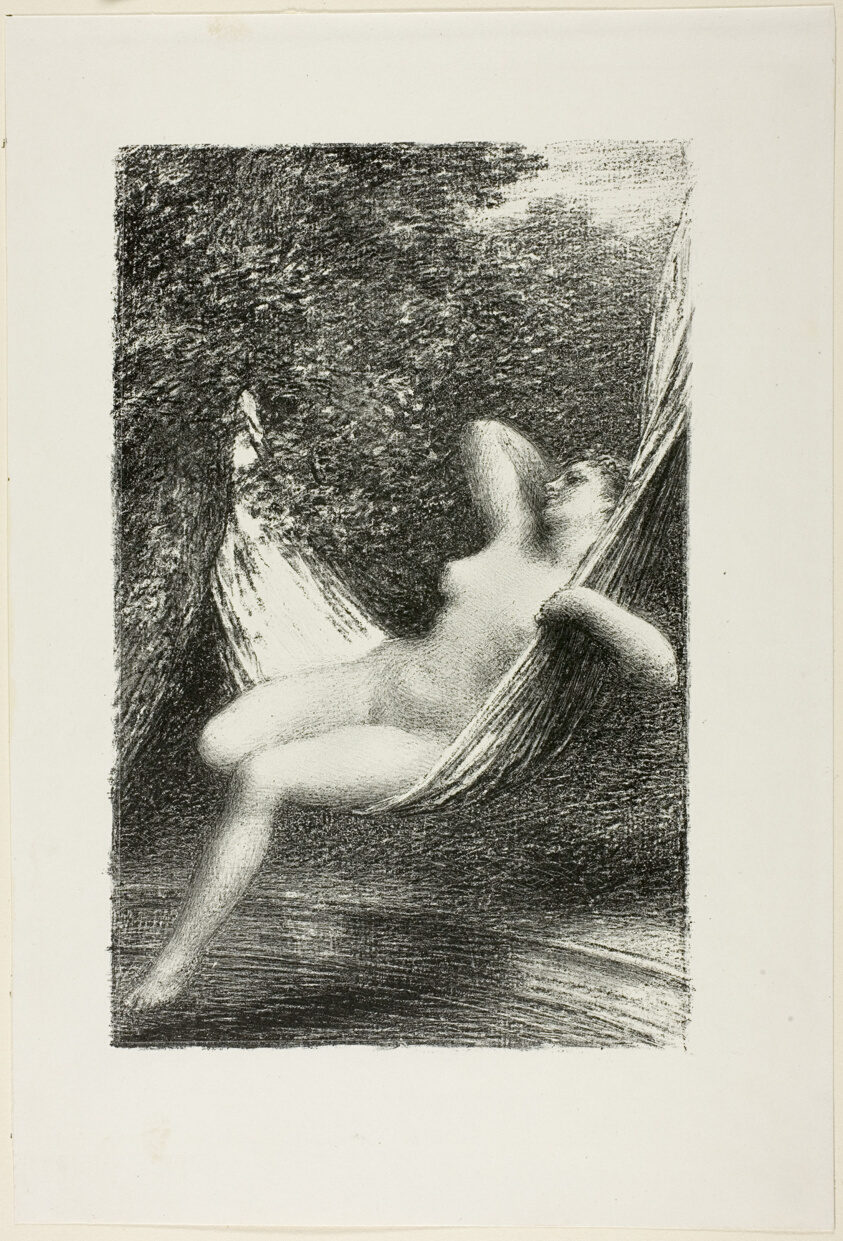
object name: Print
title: Sara the Bather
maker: Henri Fantin-Latour (French, 1836-1904)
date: c. 1888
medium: Lithograph in black on white China paper laid down on white wove paper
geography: France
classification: lithograph; print; prints and drawing